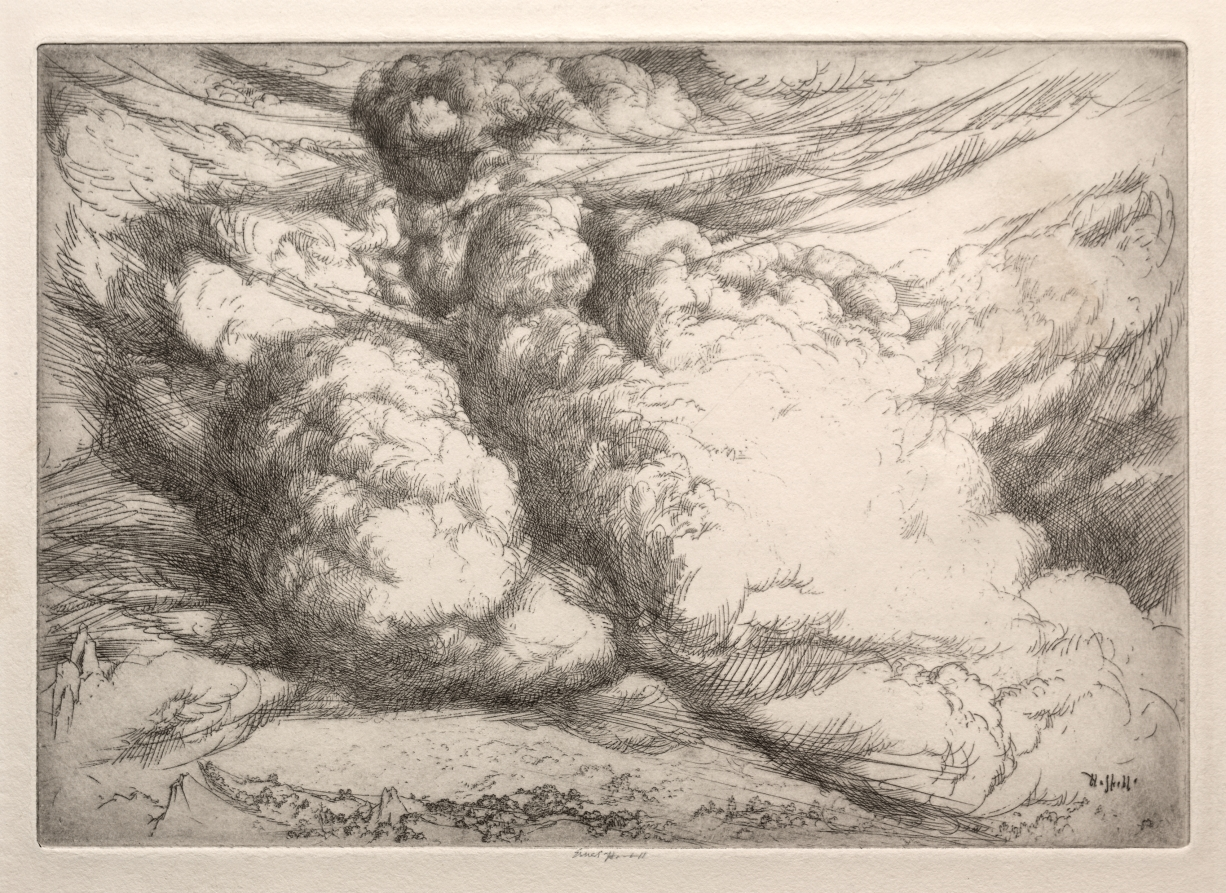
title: He Maketh the Clouds His Chariot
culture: America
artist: Ernest Haskell (American, 1876–1925)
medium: etching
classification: Print